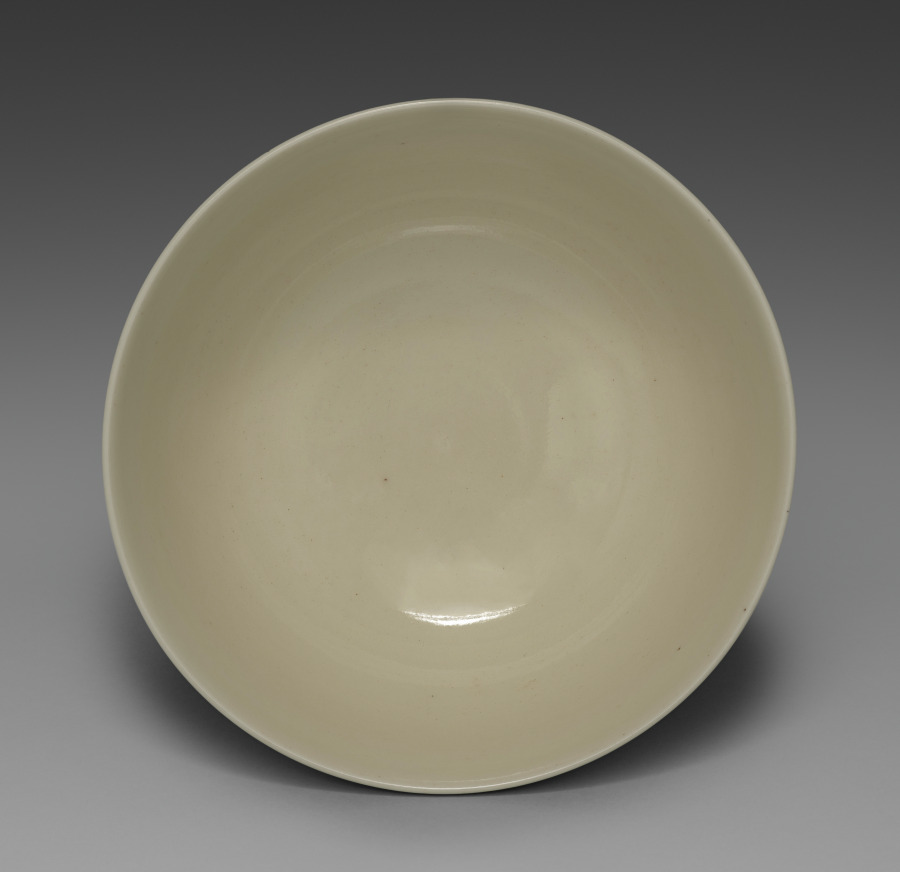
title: Sweets Bowl with Chrysanthemums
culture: Japan, Taishō period (1912–26) or Shōwa period (1926–89)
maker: Seifū Yohei IV (Japanese, 1872–1951)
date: 1914–46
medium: Porcelain with molded and carved design, underglaze color, and cream glaze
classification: Ceramic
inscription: 清風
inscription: 成山清風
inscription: 清風造 【印】 清風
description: Sweets bowls hold the confections enjoyed when drinking tea. This bowl and CMA 2022.206 offer an important lesson in appreciating Yohei IV’s ceramic practice. While they have the same design and shape and are made with the same materials, the execution of the pieces makes them entirely different after close inspection, thereby demonstrating the range of possible production results from a single template. Each bowl has the same composition of two different types of chrysanthemum flowers, one with long, slim, knifelike petals and the other with short, rounded, multilayered petals, shown running around its surface in low relief. The centers of the flowers are painted with yellow under the glaze. Yohei III formulated a number of new underglaze colors during his career, and this is likely one of them. For both bowls here, Yohei IV used his father’s kanpakuji formula, with underglaze pink for the gradated wash of color surrounding the flowers. The storage box lid provides abbreviated descriptions of the complex processes used in the surface decorations. It identifies the bowl as “Sweets dish with carved picture of chrysanthemum in kanpakuji.” The box has Yohei IV’s signature on the lid’s exterior, along with a seal reading “Seizan Seifu” 成山清風. The ink inscriptions are done in an elegant semiformal calligraphy. This bowl is more subtle and smooth in both the effect of the glaze and the execution of the relief. The designs are centered on the body between rim and foot. A closer look at the delineation of the flower petals reveals that the designs differ at times with respect to which petals appear in front or behind others. The centers of the bases of both bowls are incised with “Seifu” in a manner matching many other works by Yohei IV, although there are slight differences. As one might expect from the other differences in the bowls, the characters on the base of this subtle bowl are gentler, finishing in a tapering out of the strokes. Those on the bold bowl, CMA 2022.206, end in triangular pinheads.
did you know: This ivory and pink bowl by Seifū Yohei IV show his father’s “bright-jewel white porcelain” technique.